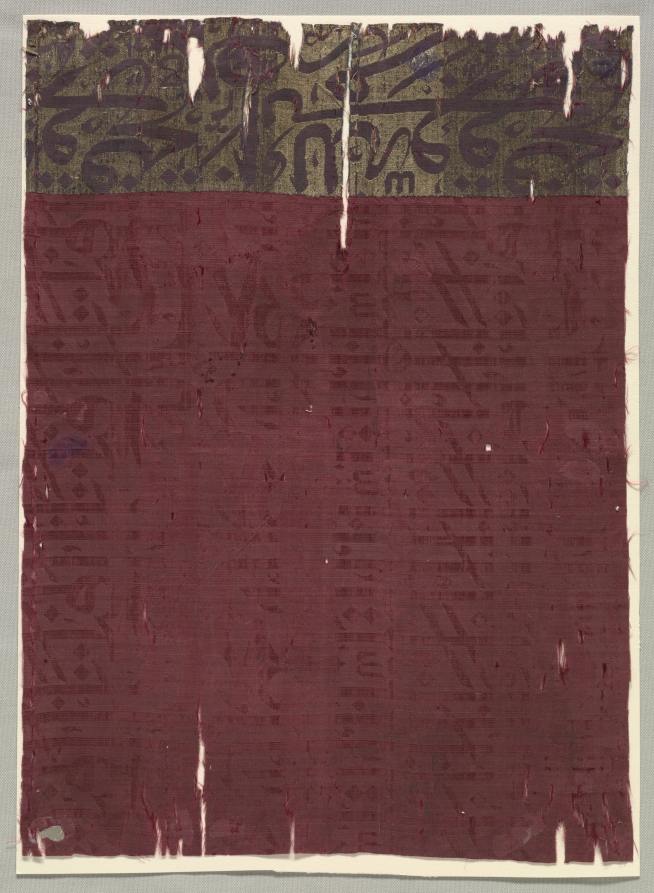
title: Textile Fragment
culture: Turkey, 17th century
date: 17th century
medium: silk damask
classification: Textile